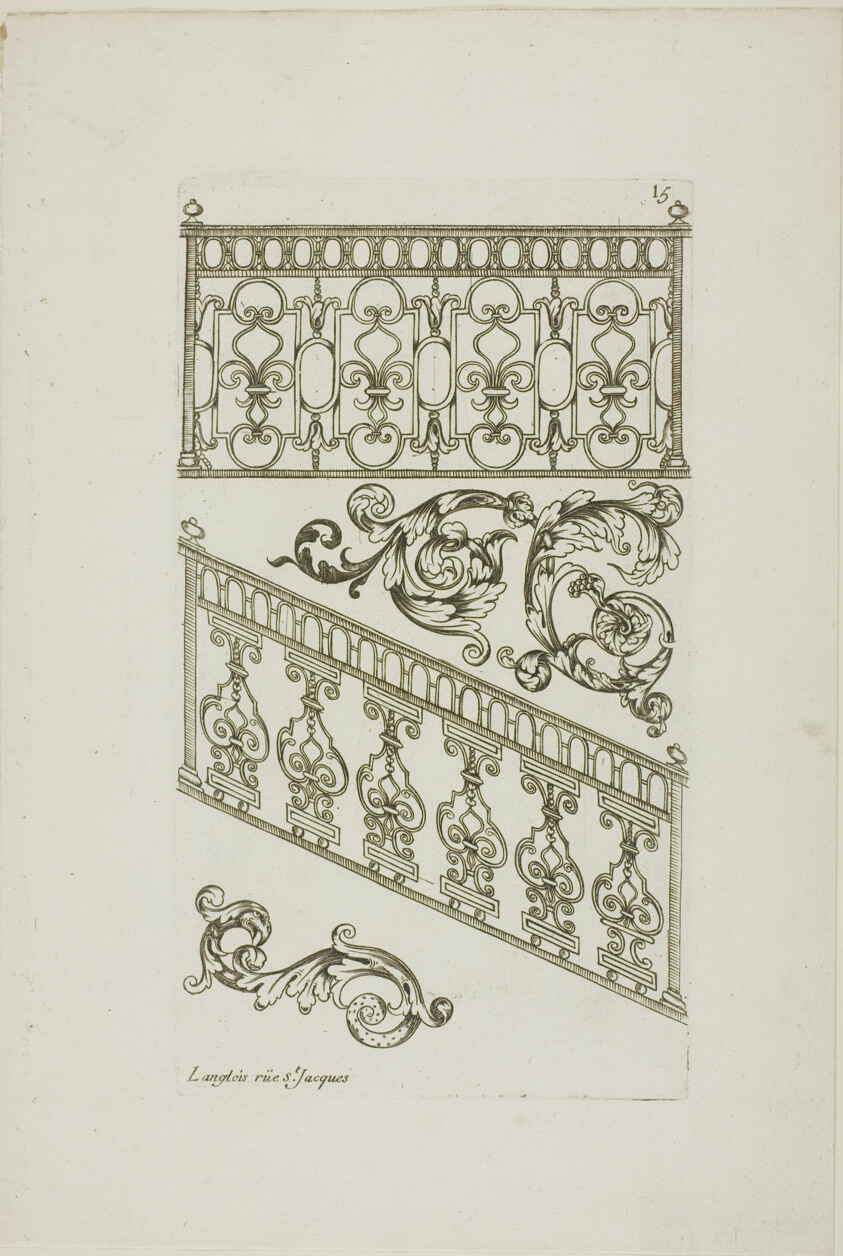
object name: Print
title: Designs for Locksmiths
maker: Jean Bérain I (French, 1640-1711); after Hugues Bris e Ville (French)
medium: Etching on paper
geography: France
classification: etching; print; prints and drawing